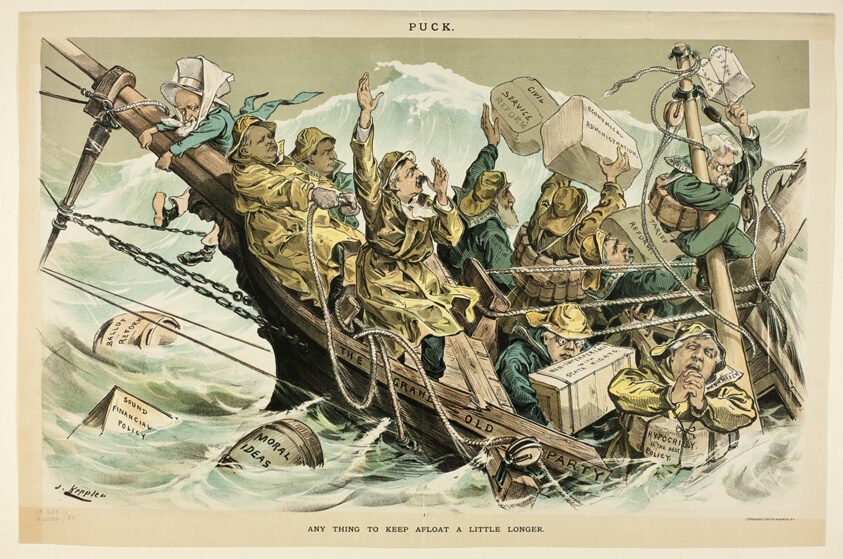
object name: Print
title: Any Thing to Keep Afloat a Little Longer, from Puck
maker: Joseph Keppler (American, 1838-1894)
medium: Color lithograph on newsprint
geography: United States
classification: lithograph; print; prints and drawing